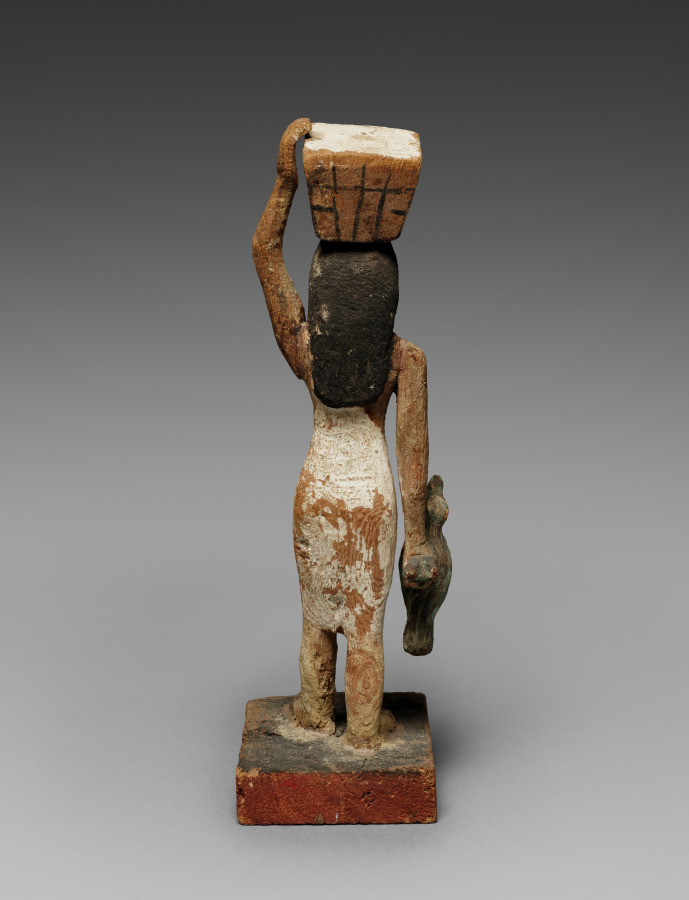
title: Female Offering Bearer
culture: Egypt, Middle Kingdom (2040–1648 BCE), Dynasties 11–12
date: 2000–1801 BCE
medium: painted wood, figure of tamarisk(?), base of sycamore fig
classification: Wood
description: The offering bearer wears a basic wraparound kalasiris dress and a strap that connects to the dress over her left shoulder. It is not known whether straps on ancient Egyptian dresses were designed as a part of the garment or were separate attachments for fashionable or utilitarian purposes. Ancient Egyptian illustrations typically identify women who wore this garment with a strap as servants, whereas artisans depicted men of all socioeconomic levels wearing the version for men.